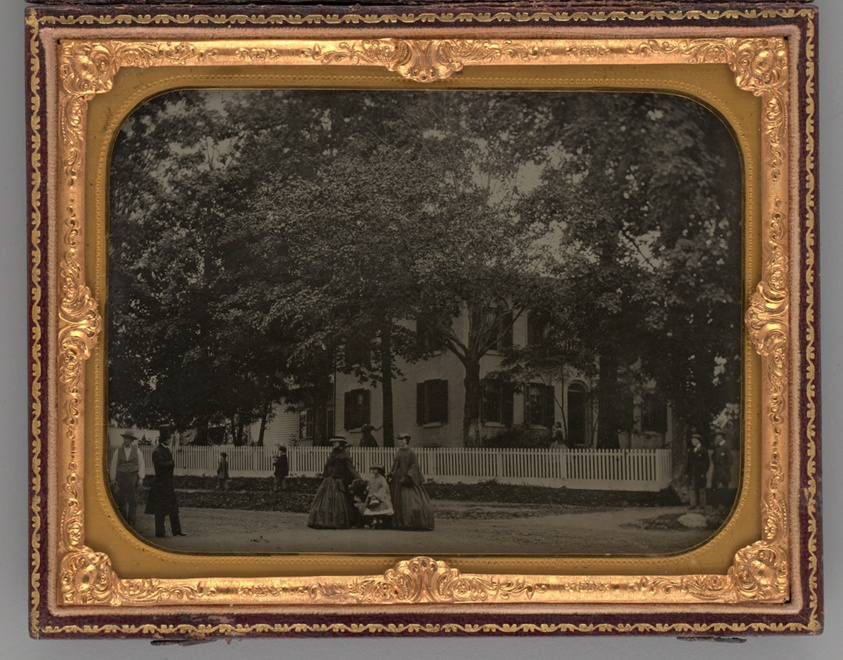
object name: Photograph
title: Untitled (People in front of a Building)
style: 19th century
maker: Unknown maker; American, 19th century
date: 1861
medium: Ambrotype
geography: United States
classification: photography; ambrotype; portrait; photograph; photographic process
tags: lundberg collection, buildings, cities, city scenes, houses, people, urban life